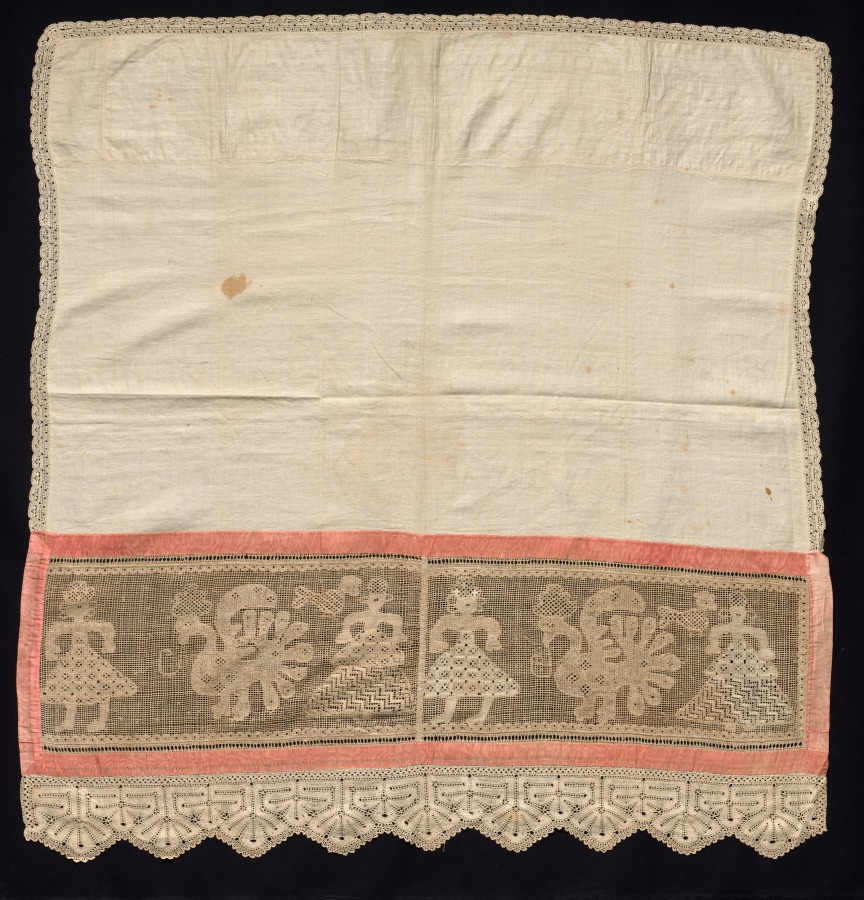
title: Cloth with Border of Female Figures and Peacocks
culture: Russia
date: 1700s–1800s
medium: Linen: needle lace (cutwork and drawnwork), straight (continuous) bobbin lace, (tape lace) edging; applied silk (est.) ribbon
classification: Lace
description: This cloth may have functioned as a towel. On one end, there are two panels of lace work surrounded by pink silk ribbon. Within each panel are two women flanking a stylized peacock. A smaller bird flies near the head of the woman on the right side of each panel.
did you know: Handmade lace for marriage dowries was produced at large quantities in Russia during the eighteenth and nineteenth centuries.